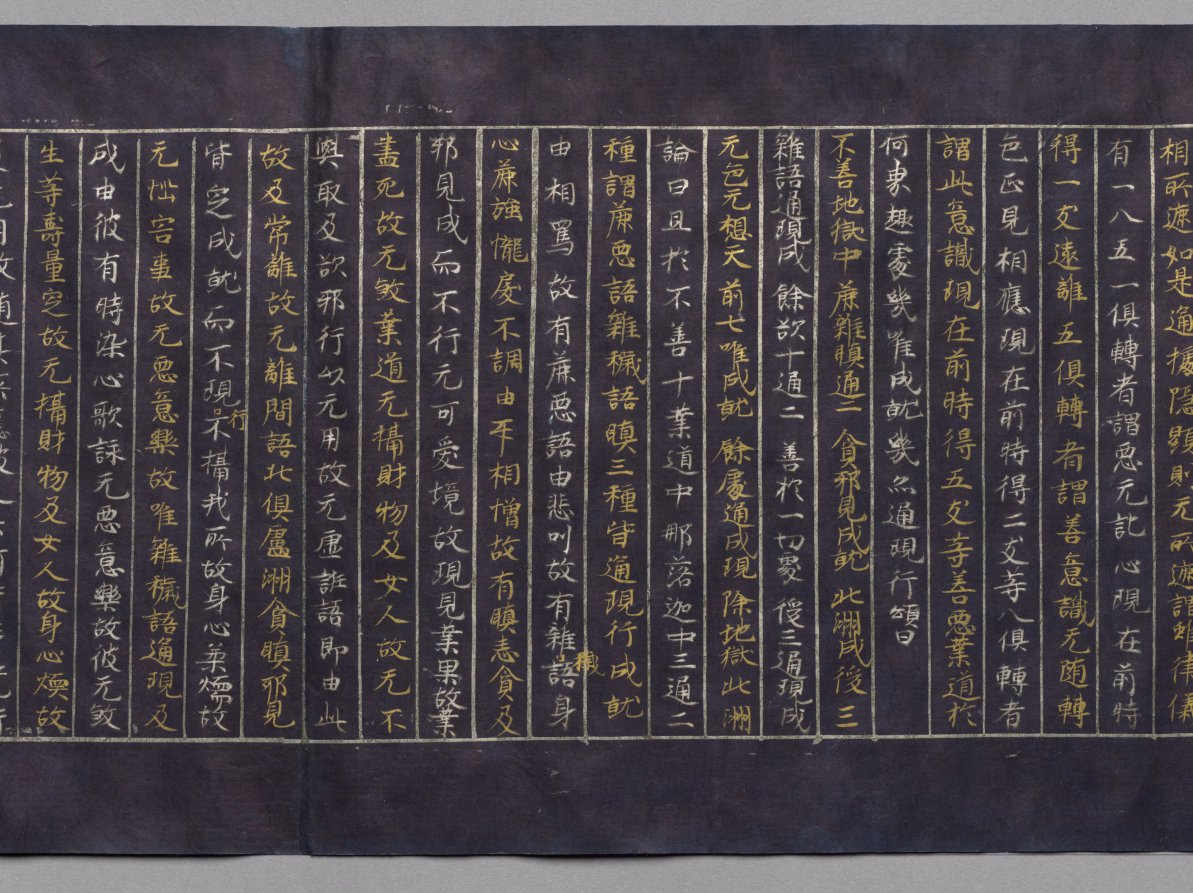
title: Meta-Discourse on the Teachings from the Treasury (Abidharmakosha-Bhashya)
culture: Japan, Heian period (794–1185)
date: 1100s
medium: handscroll; gold and silver on indigo-dyed paper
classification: Manuscript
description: This religious text relates some of the teachings of the great fourth-century Indian Buddhist scholar Vasubhandhu. The text analyzes human consciousness in its relationship to the environment and transformations that occur during meditation. This scroll is the 17th part of a 30-part translation of the text by Xuanzang, an eminent seventh-century Chinese monk.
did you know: The frontispiece depicts the Buddha Shakyamuni preaching in a paradisical landscape.